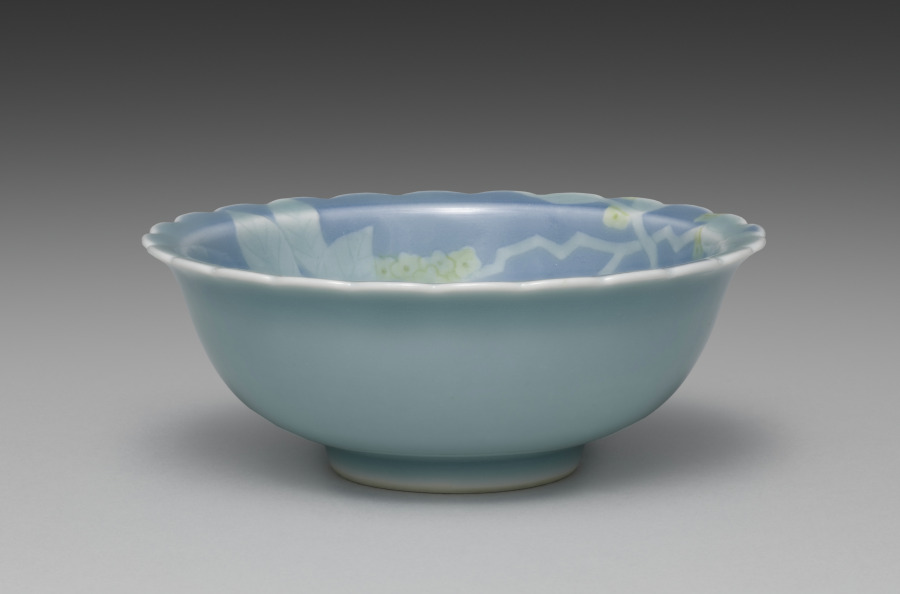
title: Dish from Dishes with Flowers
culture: Japan, Taishō period (1912–26) or Shōwa period (1926–89)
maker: Seifū Yohei IV (Japanese, 1872–1951)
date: 1914–46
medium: One from a set of five dishes; porcelain with underglaze yellow and blue glaze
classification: Ceramic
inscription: 清風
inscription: 清風造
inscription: 成山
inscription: 清風盧人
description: One can imagine a cool summer breeze when looking at this set of dishes, each shaped with a crenulated mouth and glazed with blue. Around the rim and into the basin, the bowls have low-relief designs of flowers with underglaze yellow petals; their leaves and stems show white through the glaze. On each dish, the design continues over the rim onto one side.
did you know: Seifū Yohei IV’s dishes with flowers feature underglaze yellow.